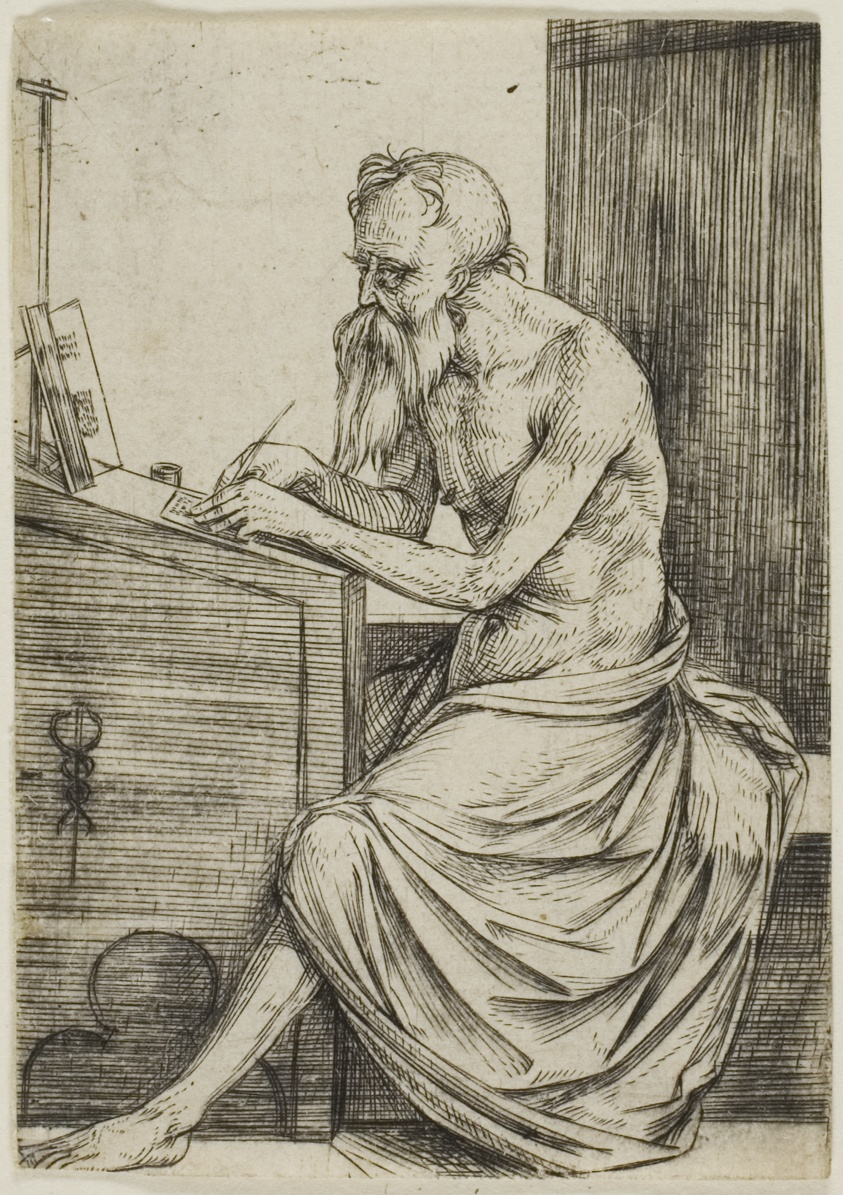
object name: Print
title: St. Jerome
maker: Jacopo de' Barbari (Italian, 1460/70-before July 1516)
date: 1501/04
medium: Engraving on paper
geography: Italy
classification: print; prints and drawing